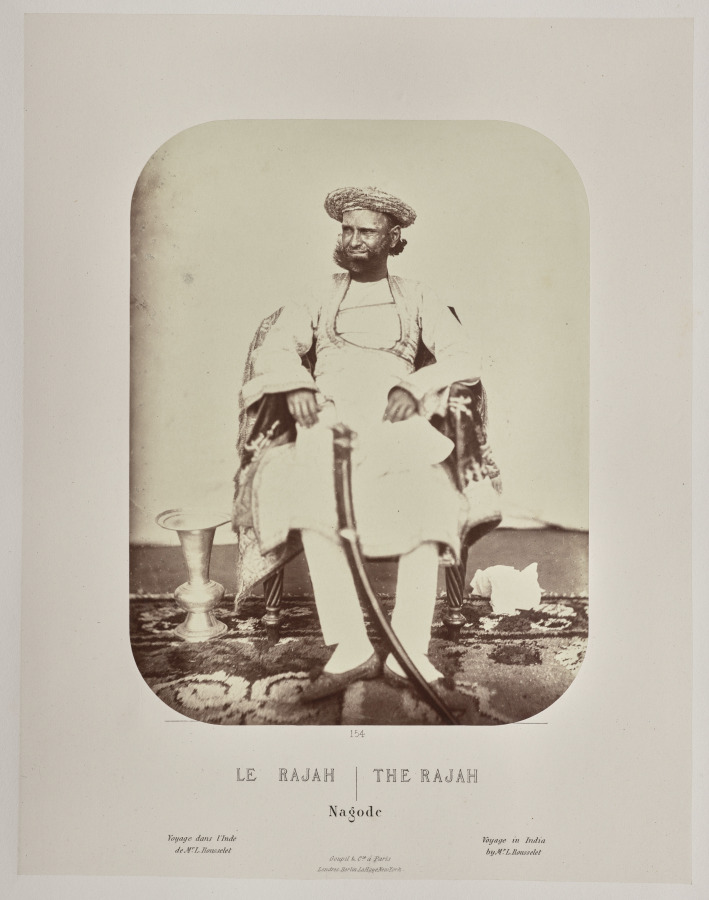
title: The Rajah, Nagode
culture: France, 19th century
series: India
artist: Louis-Théophile Marie Rousselet (French, 1845–1929)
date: 1865–68, published 1869–70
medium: Albumen print from glass plate negative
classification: Photograph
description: Concerned that his drawings did not do justice to the splendor of India’s monuments, Rousselet learned photography in India that year, a remarkable accomplishment. He proved to be a talented photographer with a sophisticated sense of composition. The scenes in this volume sweep across sites of Sultanate, Rajput, and Mughal power in northern India, from the sacred Hindu city of Varanasi on the Ganges River to Alwar in Rajasthan. Also included are several scenes of industry and portraits of Indian rulers.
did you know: Louis Rousselet described himself as a “scientific traveler” when he went to India alone at age 18 in 1863 and stayed into 1868.